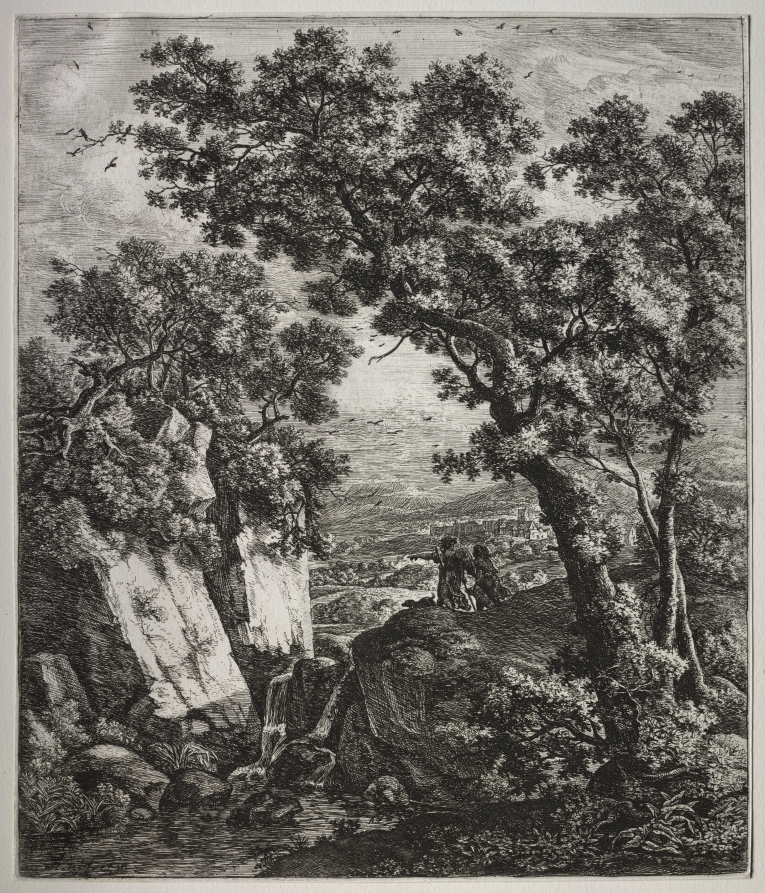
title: Six large upright landscapes with scenes from the Old Testament: Tobias and the Angel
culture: Netherlands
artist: Anthonie Waterloo (Dutch, 1609/10–1690)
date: 1640–90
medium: etching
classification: Print